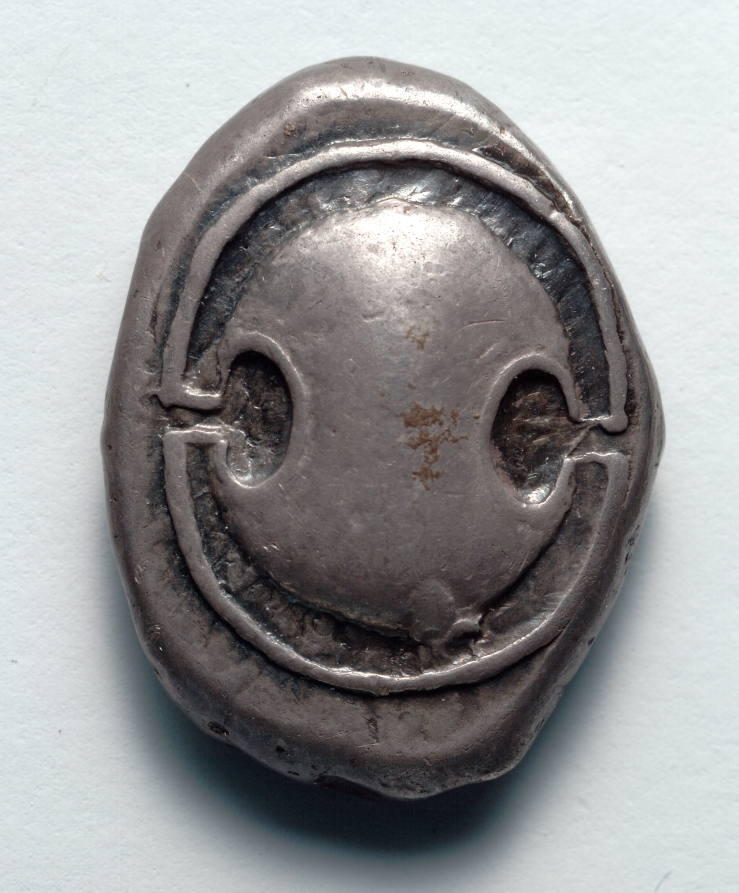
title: Stater: Boetian Shield, within Incuse Circle (obverse)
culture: Greek, minted at Thebes (Boiotia)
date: 395–387 BCE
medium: silver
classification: Coins